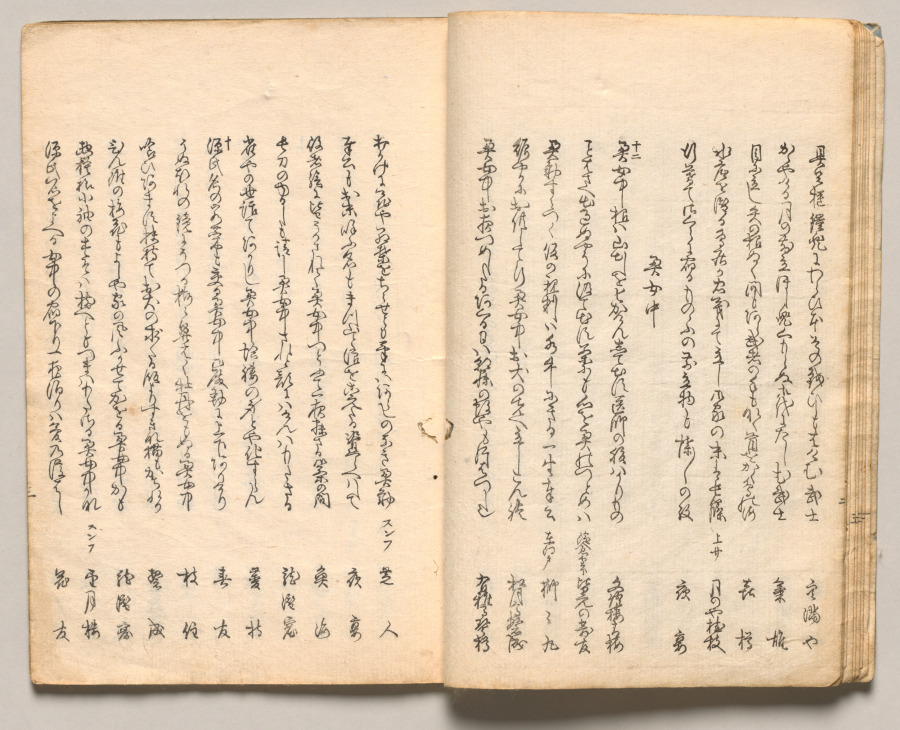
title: Spread Ten from Volume Two of People of Japan in Light Verse (Kyōka)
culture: Japan, Edo period (1615–1868)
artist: Utagawa Hiroshige (Japanese, 1797–1858)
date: 1857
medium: Woodblock-printed book; ink and color on paper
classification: Bound Volume